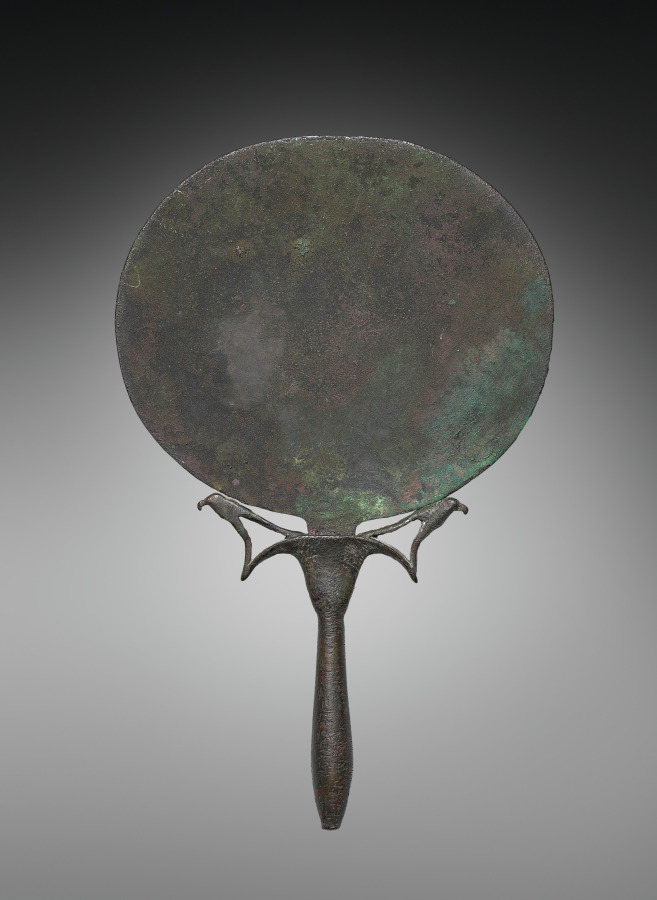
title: Mirror with Falcons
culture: Egypt, New Kingdom (1540–1069 BCE), Dynasty 18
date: 1540–1296 BCE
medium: mirror of copper, handle of tin-bronze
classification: Cosmetic Objects